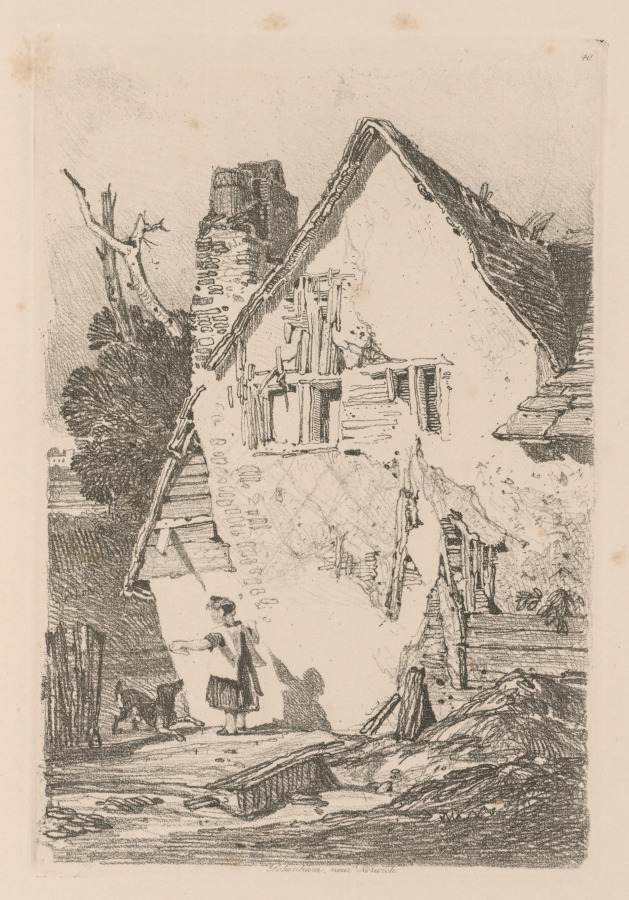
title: Liber Studiorum: Plate 40, Lakenham, near Norwich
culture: England, 19th century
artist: John Sell Cotman (British, 1782–1842)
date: 1838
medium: softground etching, from a bound volume containing 48 plates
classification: Bound Volume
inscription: In plate, within image, upper right: 40; in plate, below image: Lakenham, near Norwich